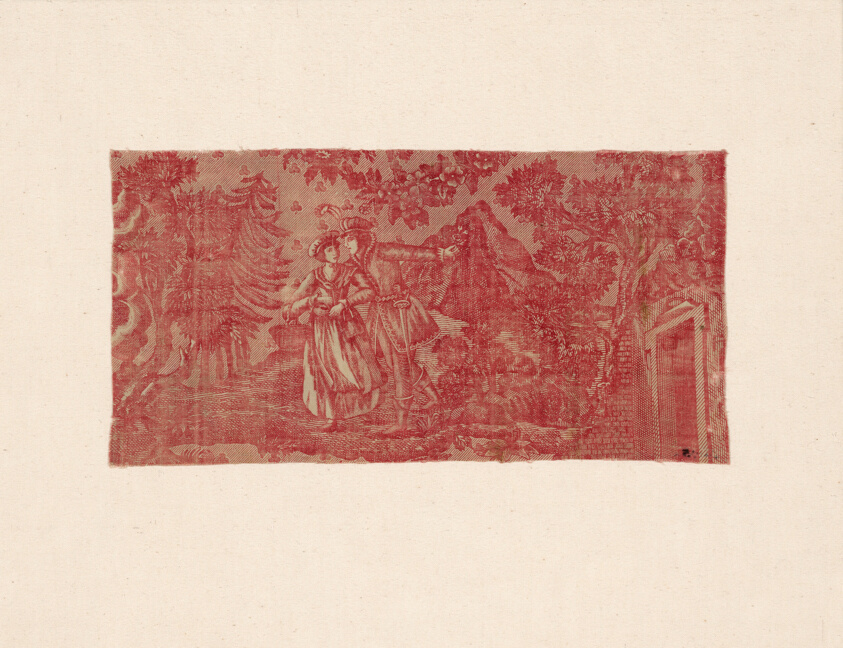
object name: Textile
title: La Trève de Dieu (God's Truce) (Furnishing Fabric)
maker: Philippe Wyngaert (Flemish, active c. 1820); France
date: c. 1820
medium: Cotton, plain weave; engraved roller printed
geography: France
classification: textile; weaving - printed; furnishing textile